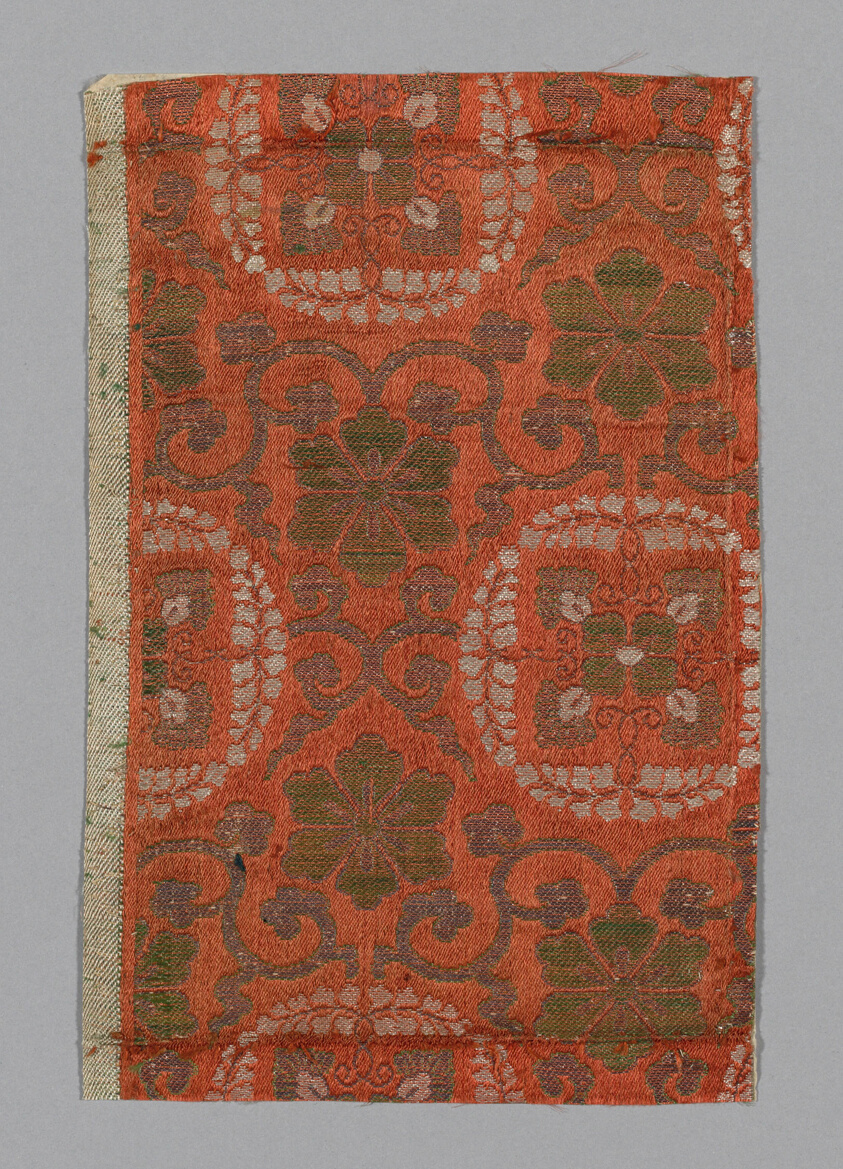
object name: Textile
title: Fragment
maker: Japan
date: late Edo period (1789–1868), 1800/25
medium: Silk and silver-leaf-over-lacquered-paper, satin weave with supplementary patterning wefts bound by secondary binding warps twill interlacings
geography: Japan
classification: textile; weaving